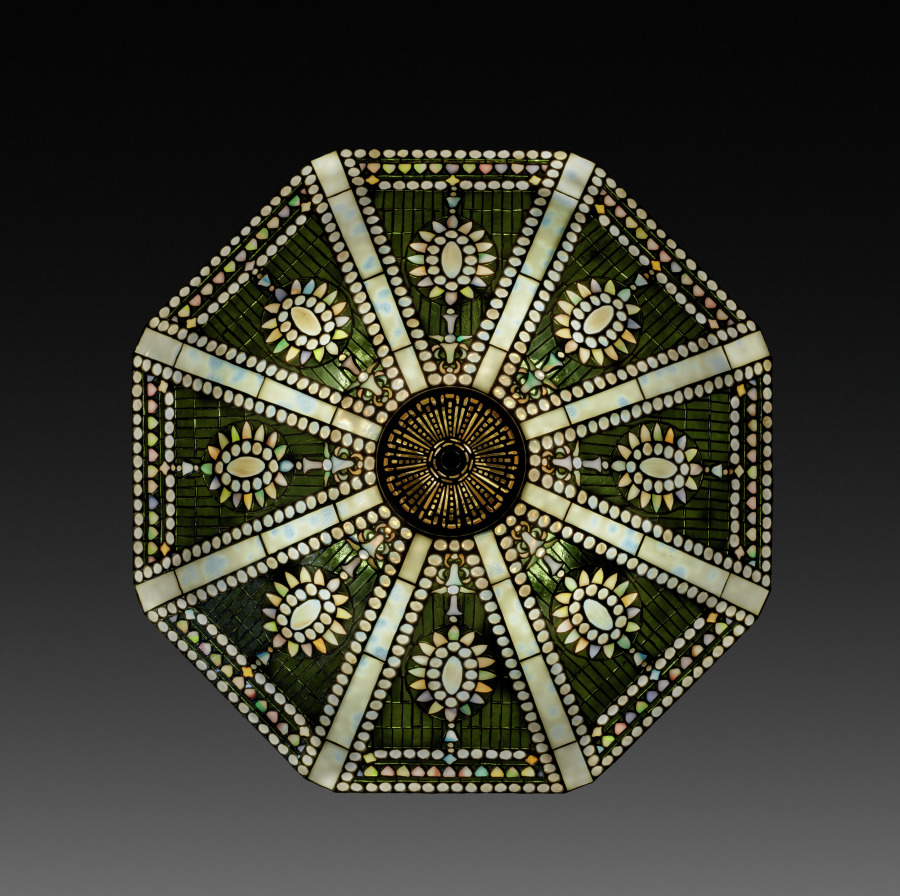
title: Empire Table Lamp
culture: America, New York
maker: Tiffany Studios (United States, New York, 1902–32)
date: c. 1902–10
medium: Leaded glass, gilt bronze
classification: Lamp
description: Although Tiffany often wrote of his disdain for romanticizing the past, he recognized that many of his customers favored historical styles. He kept his showrooms well stocked with colonial revival furniture and lamps, such as the Napoleon-inspired Empire pattern, with its abstracted neoclassical swags and medallions, that fit easily within traditional decor.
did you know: The row of little green glass tiles at the bottom edge of this shade is meant to resemble a row of silk fringe.